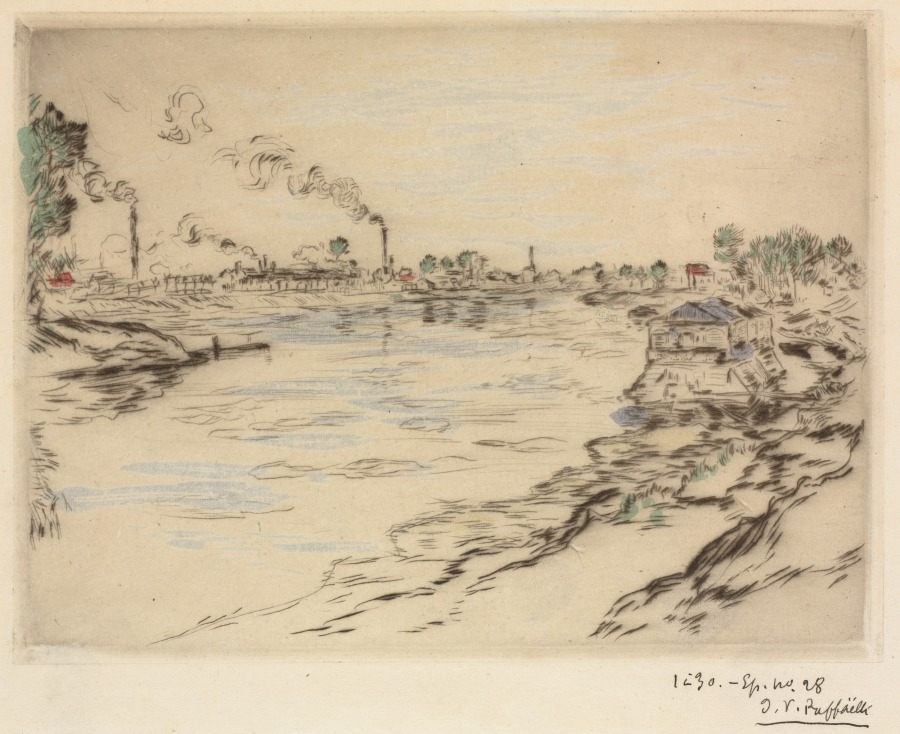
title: La Seine, à Asnières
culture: France, 19th century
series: Types de petits Gens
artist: Jean-François Raffaëlli (French, 1850–1924)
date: 1894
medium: etching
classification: Print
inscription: lower right margin, in pen and black ink: 1 à 30.-Ep. No. 28 / J. F. Raffaëlli